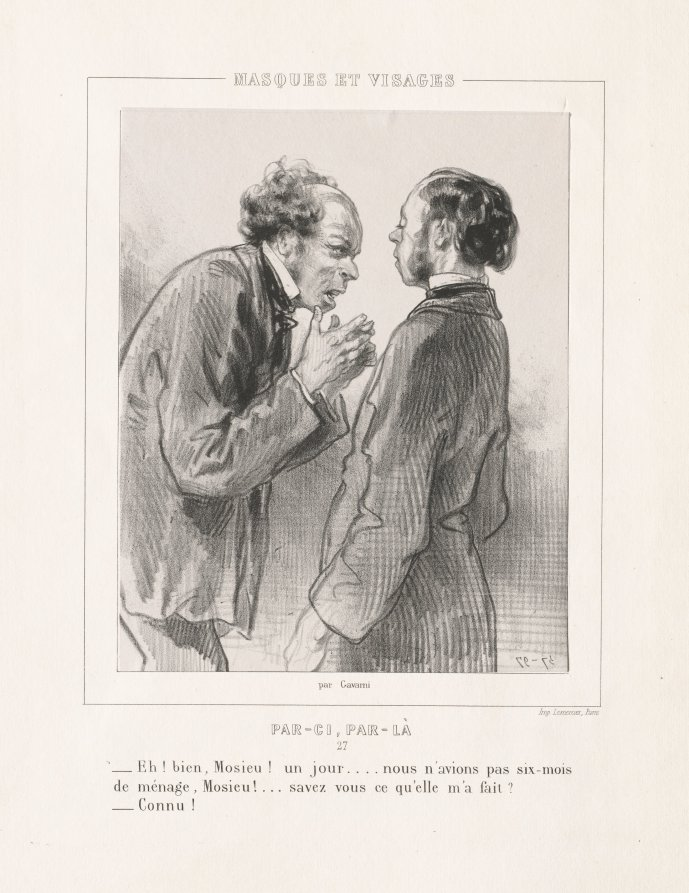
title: Masques et Visages: Par-ci, Par-la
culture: France, 19th century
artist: Paul Gavarni (French, 1804–1866)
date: 1850s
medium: lithograph on chine collé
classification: Print